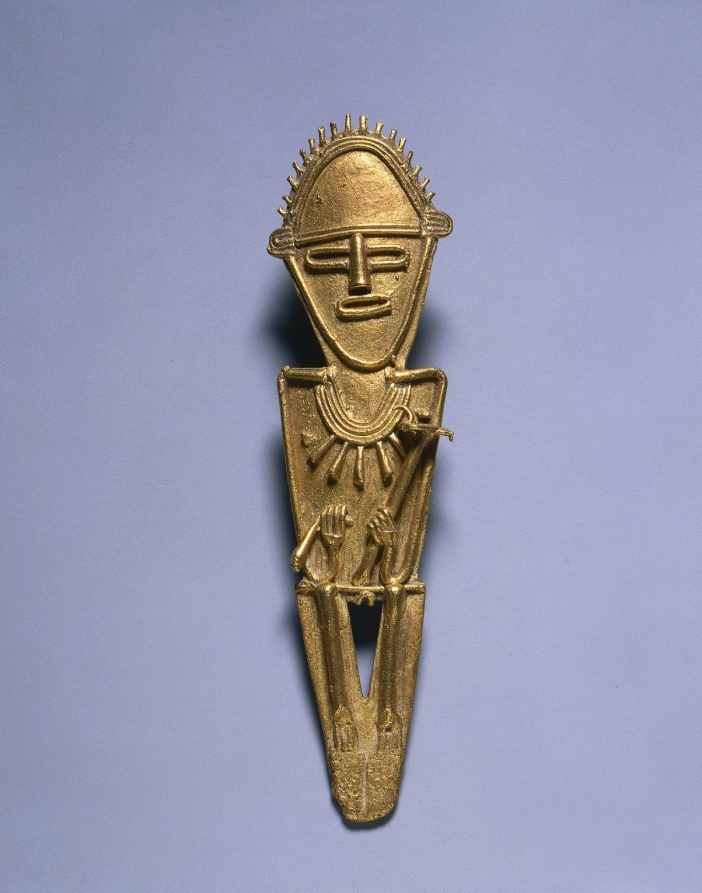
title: Tunjos (Votive Offering Figurine)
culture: Colombia, Muisca style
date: c. 900–1550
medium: cast gold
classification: Metalwork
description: Unlike the other gold ornaments made in the isthmian region, tunjos were not worn; instead, they served as offerings that were deposited in sacred places such as lagoons and caves. They often depict humans who hold something. Perhaps because they were not meant for display, tunjos were not finished after lost-wax casting. Flaws remain uncorrected, surfaces are unpolished, and gold that backed into the channel used to pour the molten metal into the mold was left in place.